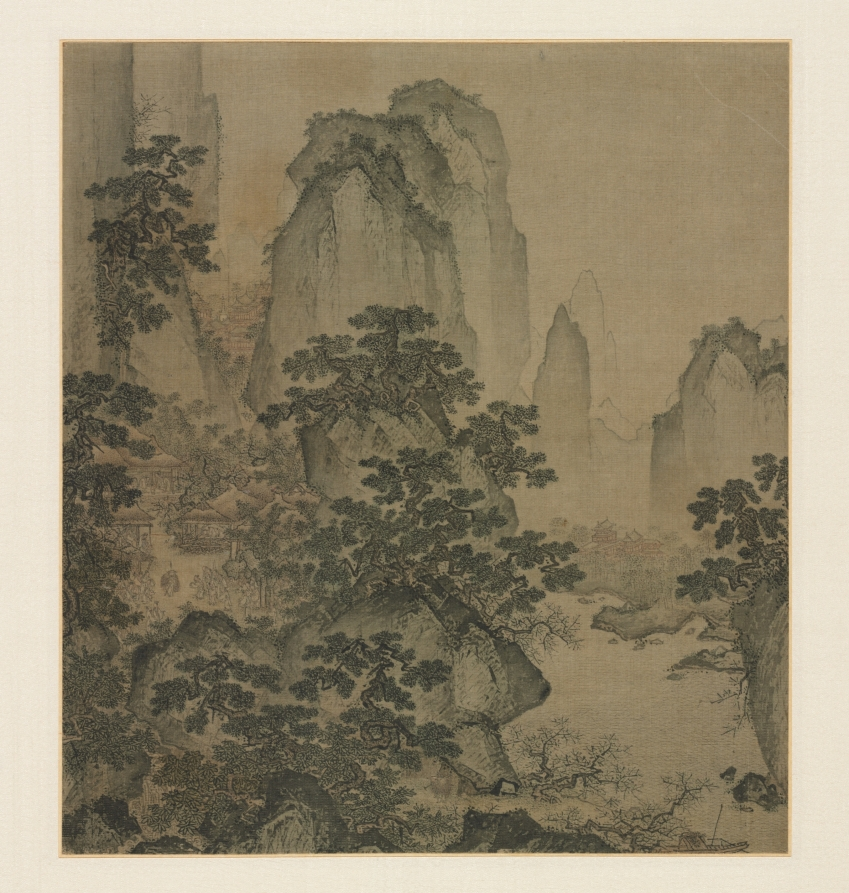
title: The Haven of the Peach-Blossom Spring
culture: China, Ming dynasty (1368–1644)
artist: attributed to Shi Rui (Chinese, c. 1400-c. 1470)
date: mid-1400s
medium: Album leaf; ink and slight color on silk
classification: Painting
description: A miniature inspired by the “Peach Blossom Spring,” this painting illustrates the well-known tale written by the poet-recluse Tao Yuanming (365–427 CE), in which a fisherman accidentally discovers a hidden utopian village where residents live in harmony, untouched by the outside world's troubles. While the painting lacks a signature, scholars concur on its attribution to Shi Rui, evident from the dynamic landscape and the effortlessly rendered figures that showcase the artist's skill.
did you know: Some fifty inhabitants of the Peach Blossom Spring gather in a small clearing surrounded by thatched huts and cottages.